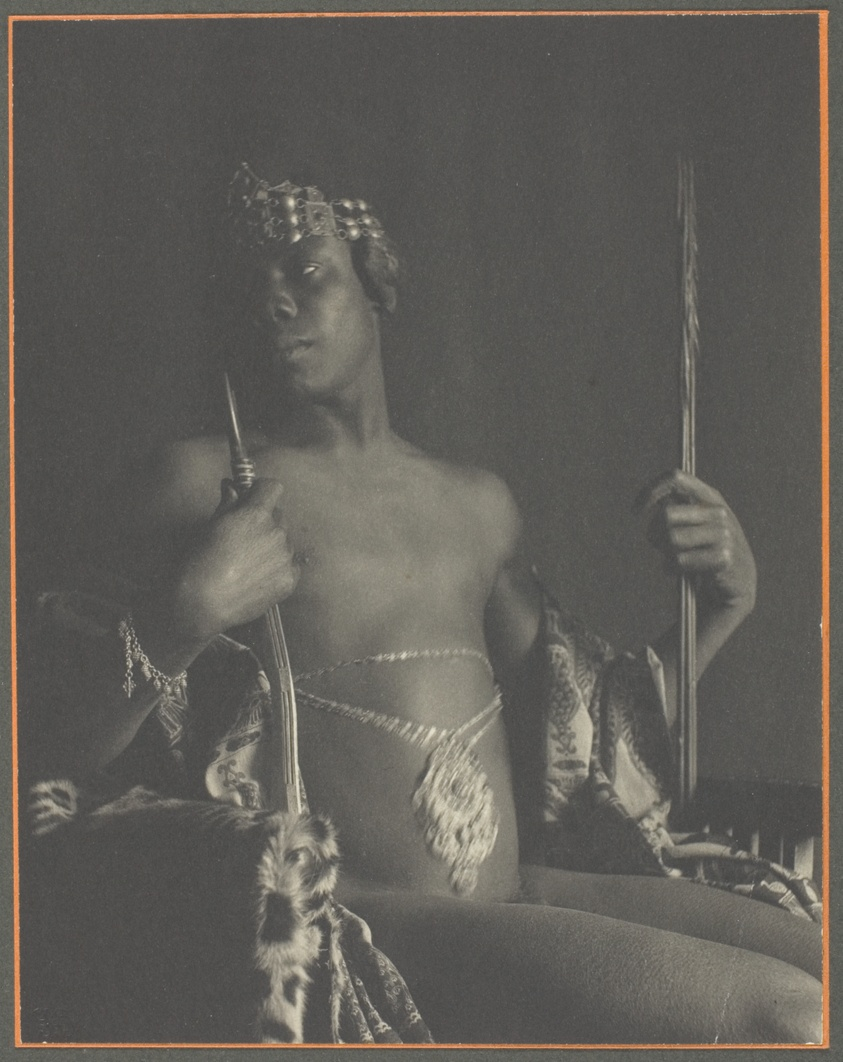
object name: Photograph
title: Menelek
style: Pictorialism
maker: F. Holland Day (American, 1864–1933)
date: 1896/1902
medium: Platinum print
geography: United States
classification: platinum print; photographic process; photography; photograph